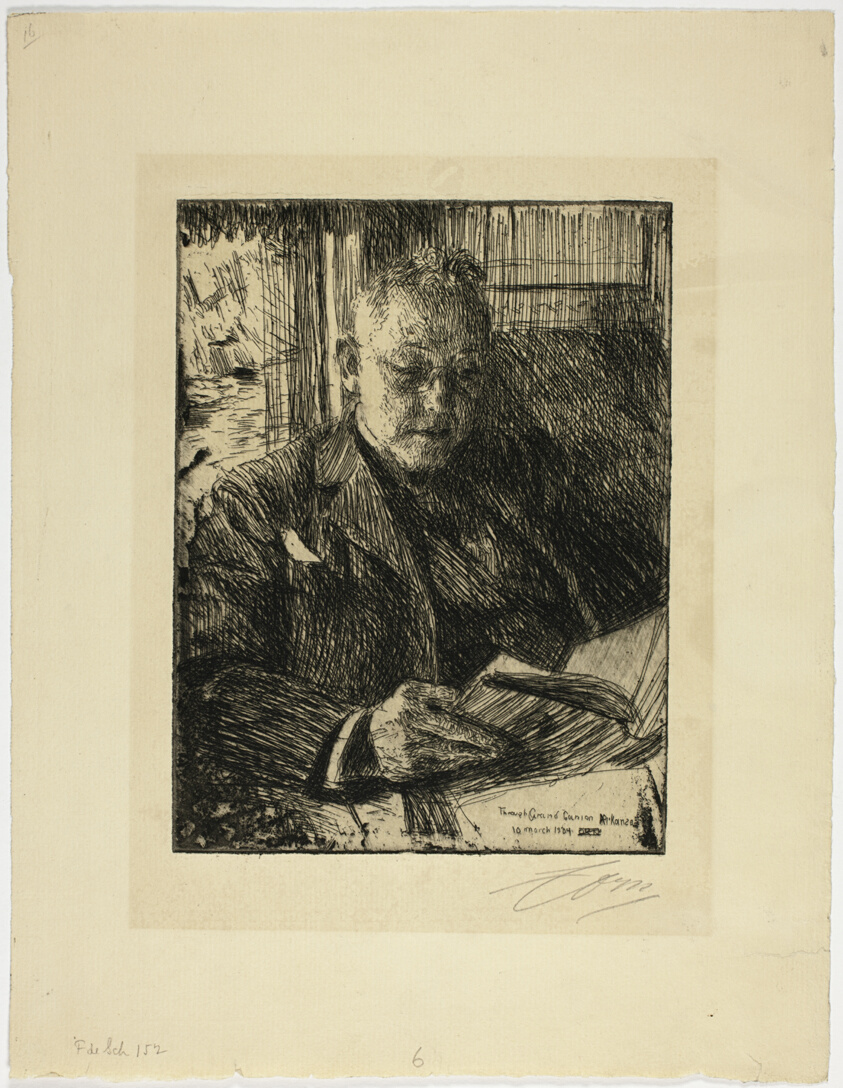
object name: Print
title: Travelling Companion (Mr. Ch. Deering)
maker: Anders Zorn (Swedish, 1860-1920)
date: 1904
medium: Etching in black on ivory laid paper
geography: Sweden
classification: etching; paper; print; prints and drawing